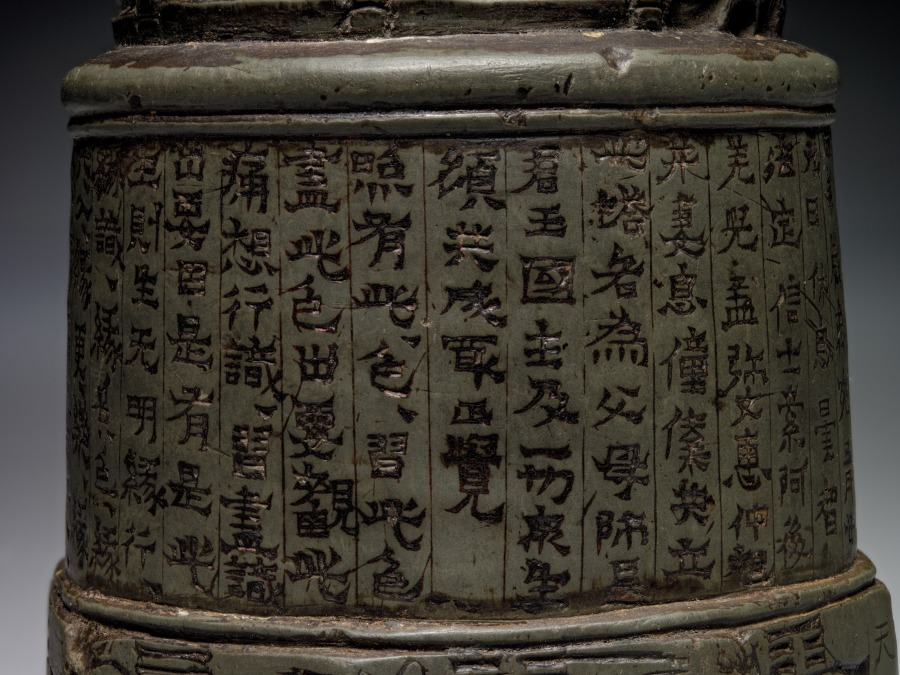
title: Miniature Votive Stupa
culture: China, Gansu province, Northern Wei dynasty (386-534)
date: 435 CE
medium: steatite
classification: Sculpture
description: This sutra pillar, inscribed with a sacred Buddhist text, belongs to a group of miniature stupas (jingta) that were found exclusively in the Gansu corridor, Northwest China. Ranging in date between AD 426–36, some of them bear the names of the lay Buddhist donors who commissioned them. A stupa is an architectural round structure built for the veneration of Buddhist relics. Miniature stupas may have commemorated the visit of a sacred site or represented donations to religious communities and sites.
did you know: There are trigrams, three horizontal lines, broken or continuous, above each of the eight bodhisattvas in the stupa's lower section.